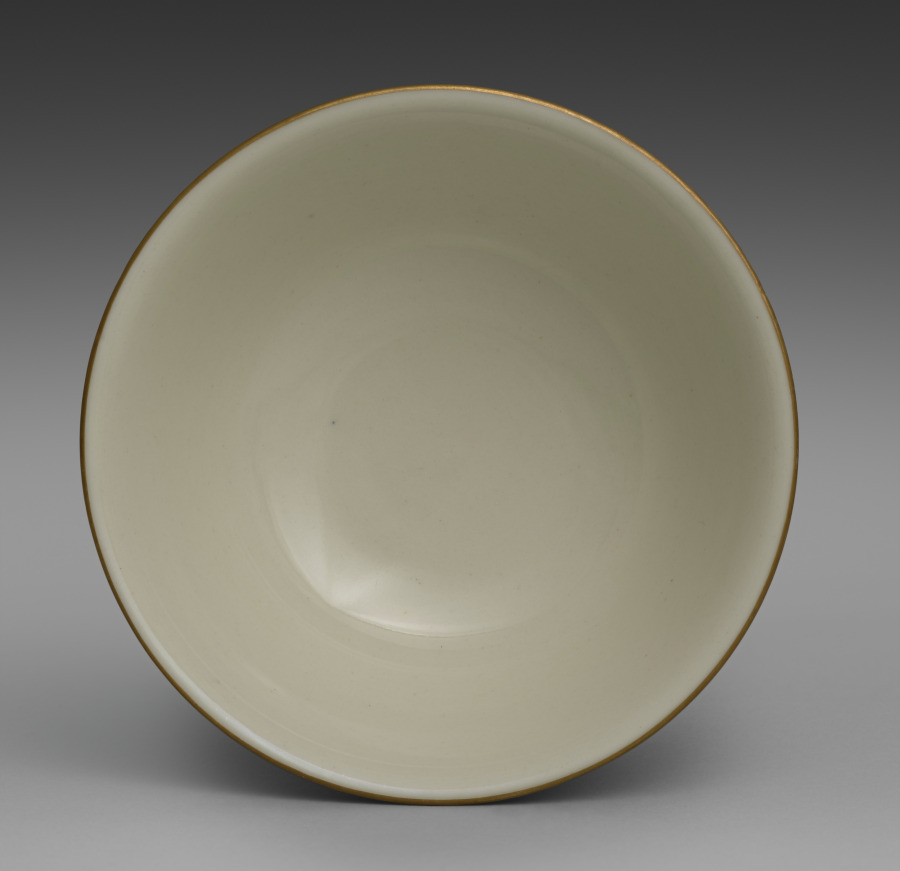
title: Bowl from Dining Set with Plum Blossoms and Cracked-Ice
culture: Japan, Meiji period (1868–1912)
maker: Seifū Yohei II (Japanese, 1844–1878)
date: c. 1875–78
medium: Porcelain with molded designs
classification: Ceramic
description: Each item in this set has a delicate low-relief design of flowering plum branches over scattered, intersecting lines meant to resemble the cracked-ice surface of a frozen body of water and is signed on the base in gold pigment. While Yohei II produced many fine works in underglaze blue, like those produced by Kiyomizu Shichibei, he also made works in quite different styles later in his career, from the early 1870 s. In 1873, he was appointed purveyor to the Industrial Center of Kyoto Prefecture, a designation associated with Kyoto’s efforts to reach an international market through the port of Kobe; and from 1875 until his death, he was involved in national-level projects to present Japanese ceramics across the world. It was during this period that Yohei III was apprenticed to Yohei II, and it has been suggested that this set may in fact be an early example of Yohei III’s work, which he signed with his teacher’s name. Decorated with flowers resembling Japanese textile motifs, the set calls to mind the design of Yohei II’s pair of vases with plum blossoms in the Victoria and Albert Museum. Here, the elaborate trees created for a formal public exhibition setting have been translated into the approachable blossoms of the genteel domestic environment. While the designs are consistent across the pieces, each raised flower petal and pistil and each incised line in the ice was done by hand, so the cups, bowls, and dishes are similar yet unique. The bottoms of two boxes once identified the set’s owner, but the information has been deliberately obscured with black ink. However, inscriptions still visible appear to indicate two occasions, once at the end of July 1886 , and once again in June 1916 , when parts of the set were requested from Hokura in Niigata Prefecture. The location corresponds to a neighborhood in the present-day city of Jōetsu. The surname Tsuji 辻 also appears on a paper tag affixed to one of the box cloths. Future research may possibly reveal more about their provenance. A vase by Yohei III in a private collection combines the formal grandeur of the Yohei II vases in the Victoria and Albert Museum with the gentler design of this dining set, placing flowering plum trees against soft, scalloped-edge clouds resembling those in golden screens.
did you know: The dining wares have a creamy white coloration that the four boxes containing them identify as Korean in style.